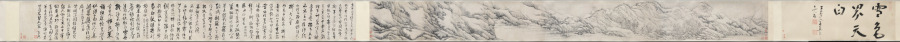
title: Snow Coloring the World White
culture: China, Qing dynasty (1644-1911)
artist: Fa Ruozhen (Chinese, 1613–1696)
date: 1690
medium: handscroll, ink on paper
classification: Painting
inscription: Artist's title on frontispiece, colophon with 6 poems, and 7 seals: [seal] Ch'ien-k'un i ts'ao t'ing. Snow Coloring the World White. Huang-shan lao-jen, Jo-chen, at the age of seventy eight. [2 seals] Fa yin Jo-chen; Huang-shih shih. (Artist's poems are not translated.) In the first month of the keng-wu year [1690], 1 was seventy-eight years old. On a snowy day I was pleased to have my good son-in-law Ch'eng-ssu and other gentlemen visiting me at my Tz'u-ching Hall at Yellow Hill. I did this snowscape to record the event. [2 seals] Fa Jo-chen; Tun Chai. [2 seals at end of painting] Fa yin Jo-chen; Huang-shih shih. trans. LYSL/WKH 12 additional seals: 8 of Ho Kuan-wu (20th c.); 1 of Wang Nan-p'ing (20th c.); 3 unidentified.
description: Fa Ruozhen was a scholar-official and prolific poet who focused on painting as his government career declined. The inscription records that he was 78 years old when he painted this handscroll to welcome visitors on a snowy day. At this point in his artistic development, Fa created expressive landscapes and experimented with unconventional brushwork. This handscroll begins at the right with gentle hills dotted with evergreens and bare deciduous trees. By the end, the twisting rocky forms dominate. Fa’s official career spanned the fall of the Han Chinese Ming dynasty (1368–1644) and the rise of the Manchurian Qing dynasty (1644–1911). While other scholar-officials who declined to serve the Manchus had their reputations enhanced, critics accused Fa of disloyalty for serving in the new bureaucracy. Fa was deeply sensitive about this criticism. In many of his 4,000 known poems, he responded by emphasizing the Confucian virtue of being a good administrator particularly during an unstable time. Fa’s “disorderly” brushwork and distressed landscapes seem to reflect the political upheaval of his era.